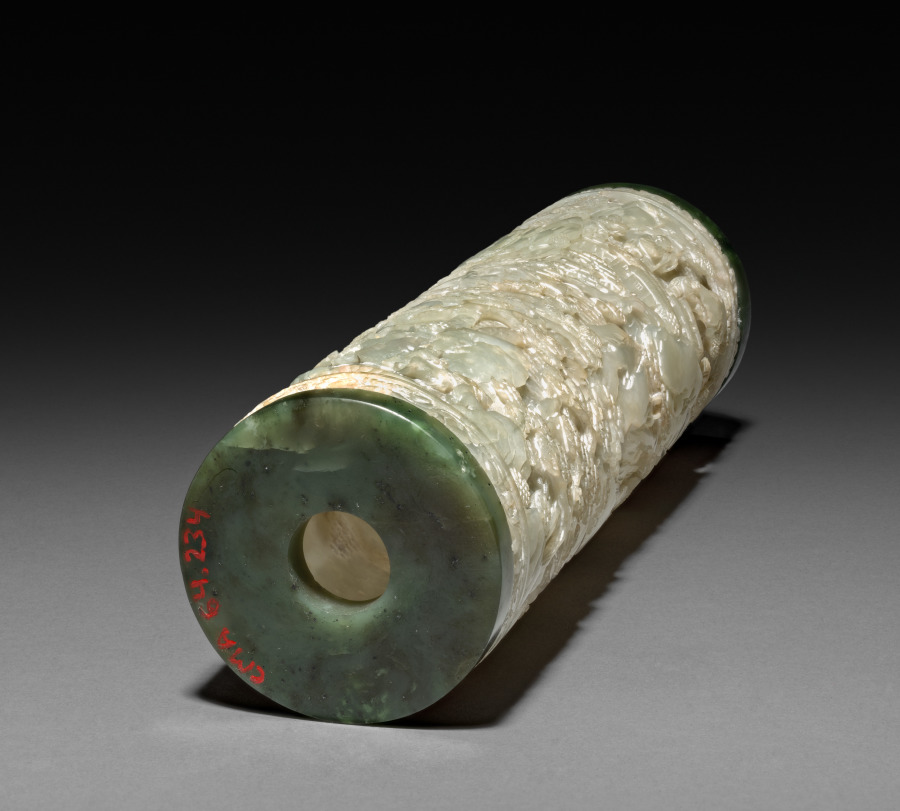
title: Cylinder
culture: China, Qing dynasty (1644-1911) or Republican period (1912-49)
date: 1800–1940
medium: jade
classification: Jade